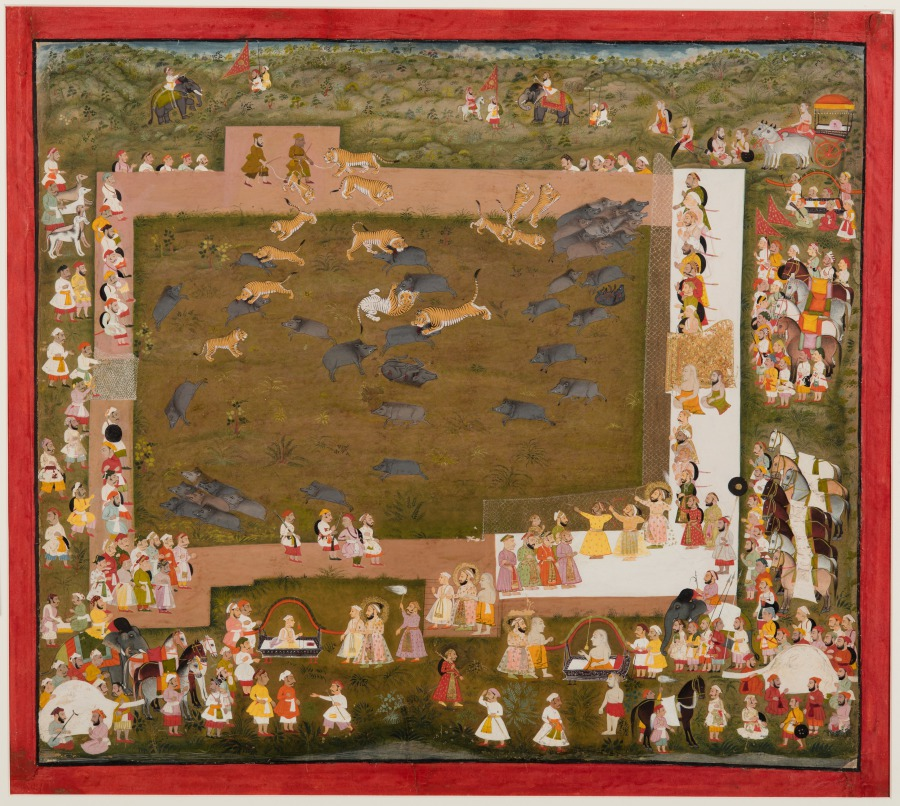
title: Maharana Sangram Singh II of Mewar (r. 1710–34) and Stages a Boar Hunt with Tigers at Sadri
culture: Northwestern India, Rajasthan, Rajput Kingdom of Mewar, Udaipur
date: c. 1720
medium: gum tempera, ink, and gold on paper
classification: Painting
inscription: [[verso, in red]] 2/48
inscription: [[verso, upper right corner]] sāḍāri od kālo cita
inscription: [[verso, in black, along bottom]] 102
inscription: [[verso, in black, to right of old inventory number]] Kimat RS 150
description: The king, who has the title of “maharana” in this region, is identifiable by his halo. At the bottom of the composition, he is pictured three times, welcoming two distinguished visitors who arrived in palanquins. He is shown again, standing behind a safety net at the corner of the white platform. He aims his arrow to shoot the boar and demonstrate his skill and virility. Two tigers are led into the arena at the top edge, and they are depicted multiple times chasing and capturing the prey.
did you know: The enclosure wall is shown from multiple perspectives, sometimes from above, sometimes in elevation.